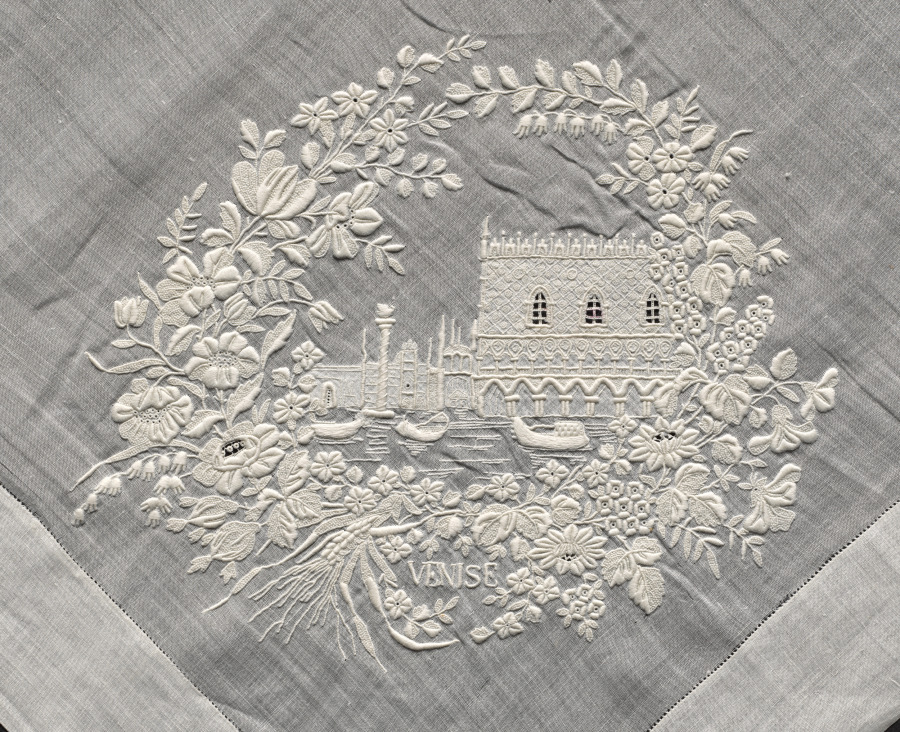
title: Embroidered Handkerchief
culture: Italy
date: 1800s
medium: Plain weave linen, embroidered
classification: Embroidery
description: A scene of the Doge's Palace, Venice, is embroidered in white in one corner of this handkerchief.